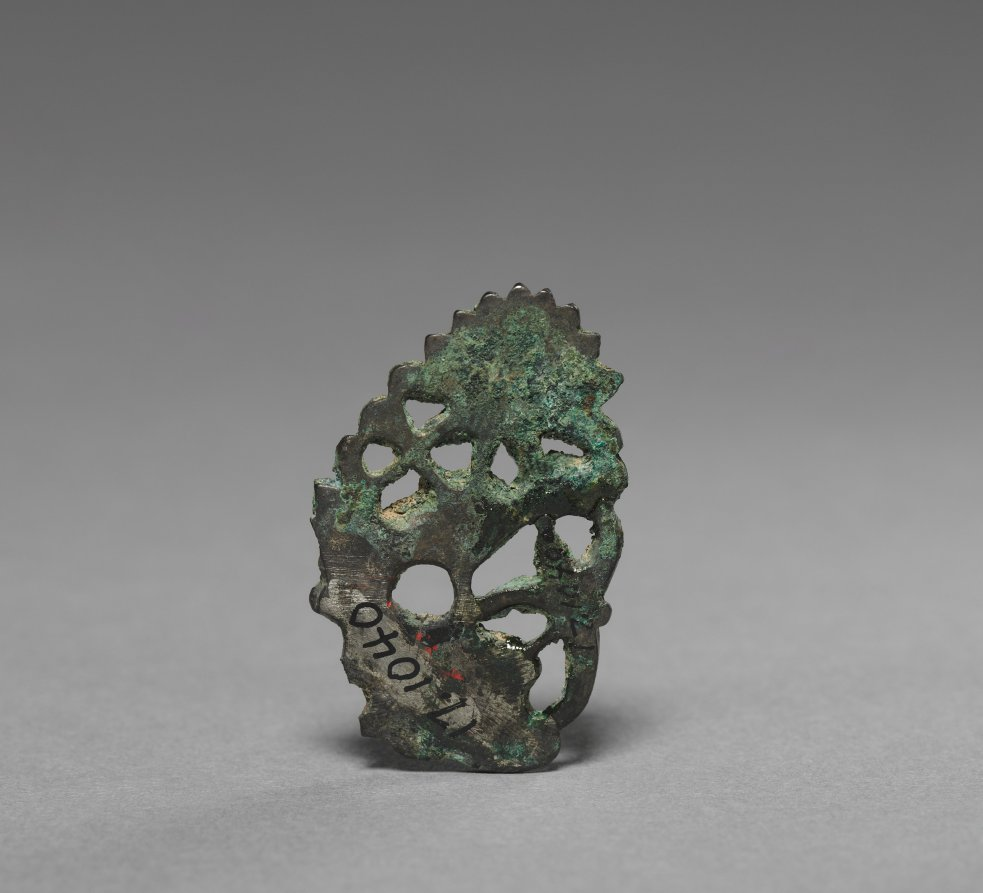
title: Ornament with Carp and Lotus Design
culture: Korea, Goryeo dynasty (918–1392)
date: 1100s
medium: gilt bronze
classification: Metalwork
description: Metalworking techniques advanced remarkably during the Goryeo period (918–1392). Sophisticated metal objects with intricate designs were used not only as daily accessories, but also as burial goods for commemorating the dead. Traces of fibers found on the backs of these metal ornaments suggest that they were once used as brooches to hold garments together.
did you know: This metal ornament is part of a decorative brooch once used to hold clothes together.